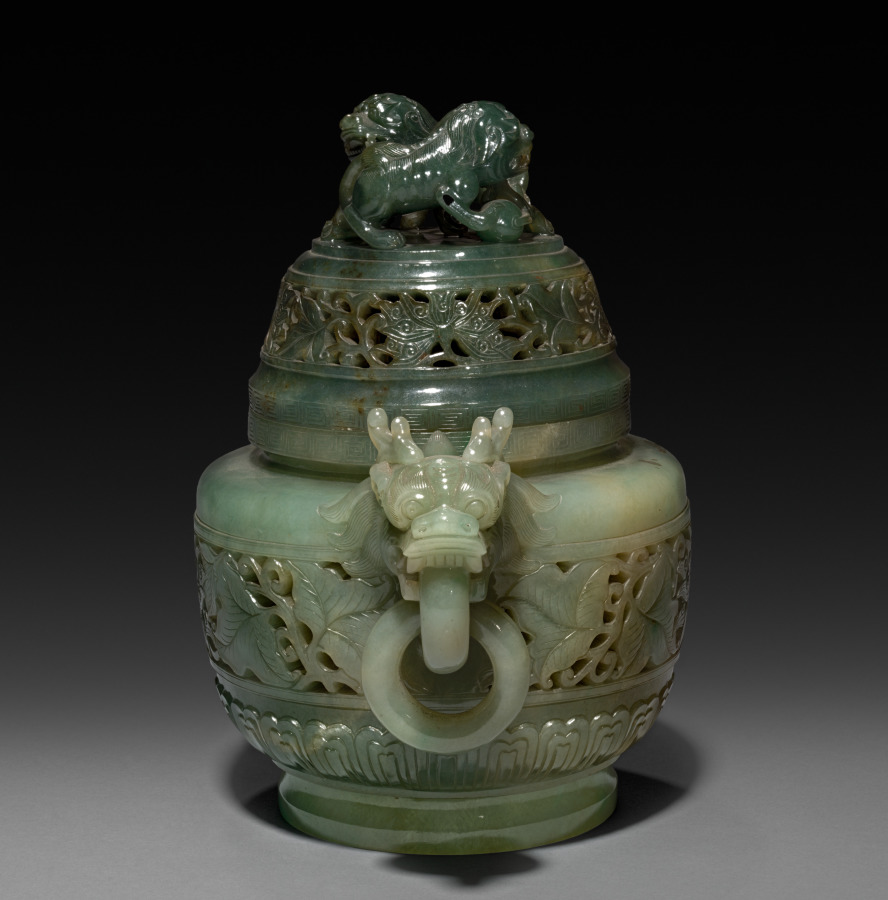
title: Koro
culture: China, Qing dynasty (1644–1911), Qianlong reign (1736–95)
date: 1736–95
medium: jade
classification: Jade